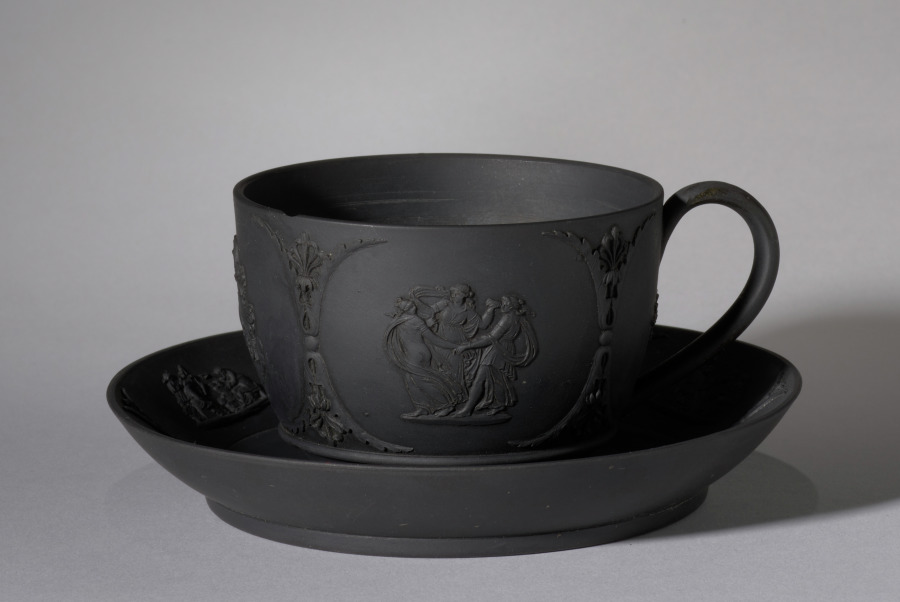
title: Cup and Saucer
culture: England, Staffordshire, 19th century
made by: Wedgwood Factory (British)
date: 1800s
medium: black basalt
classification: Ceramic